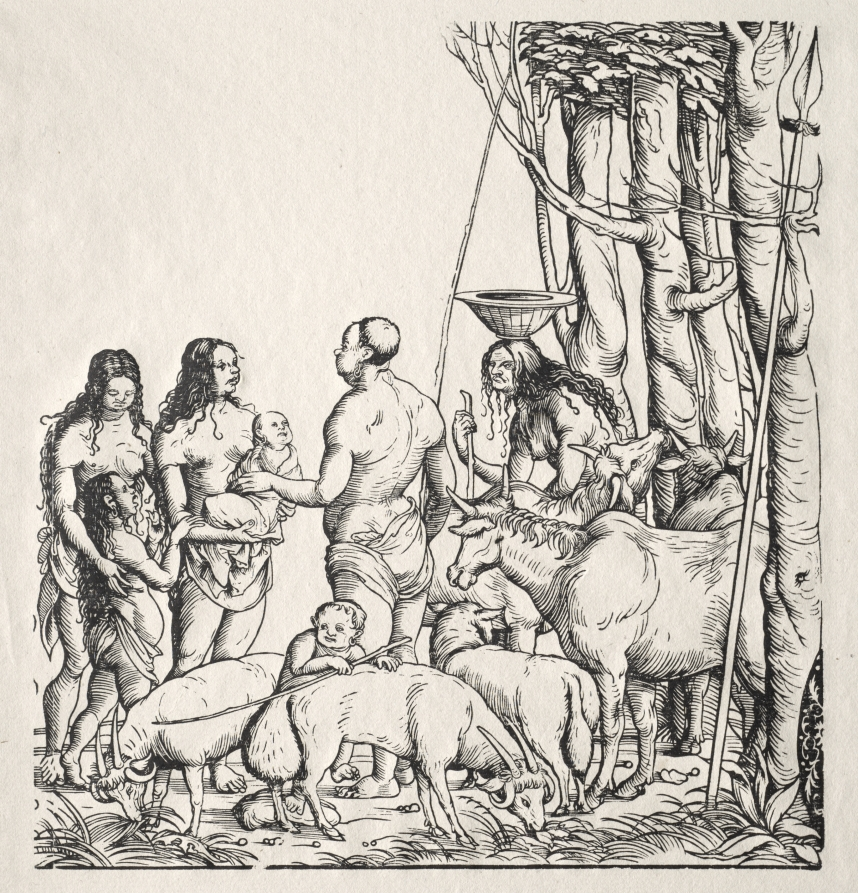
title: Hottentots with herd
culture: Germany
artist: Hans Burgkmair (German, 1473–1531)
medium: woodcut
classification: Print